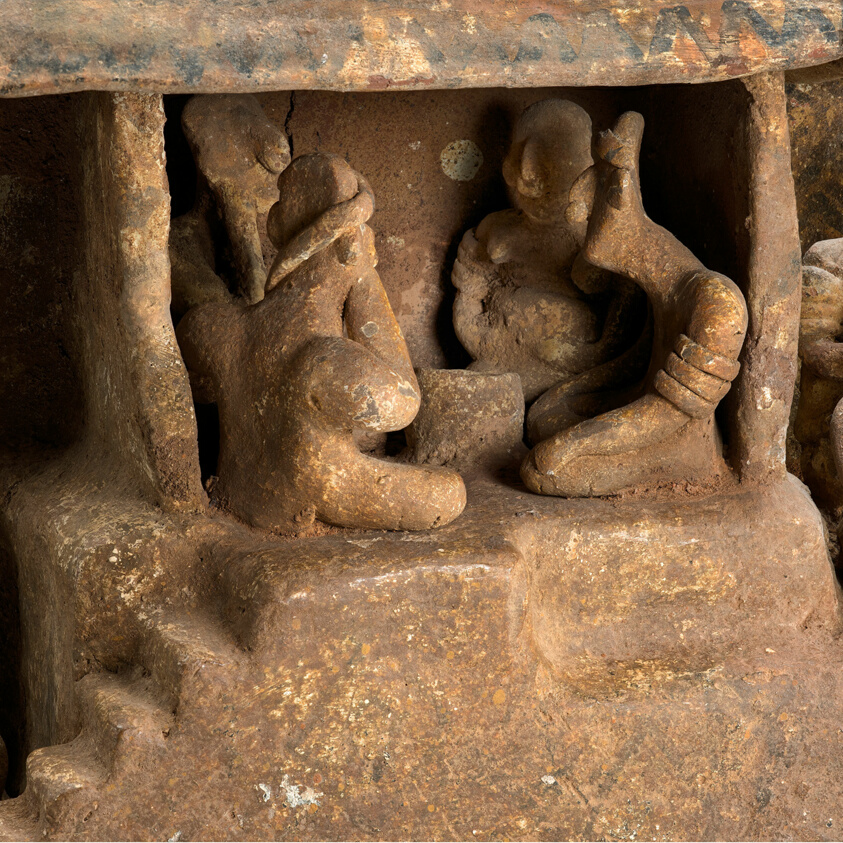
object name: Sculpture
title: House Model with Ritual Feast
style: nayarit, mesoamerican, Pre-Columbian, americas, west mexico, ixtlán del rio, Arts of the Americas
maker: Nayarit (Ixtlán del Río, Nayarit, Mexico)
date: 100 BCE–300 CE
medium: Ceramic and pigment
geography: Nayarit state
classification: earthenware; art of the americas; ceramics; sculpture; funerary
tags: architecture, funerary art, people, drinking, communities, temple, ritual, houses, feast